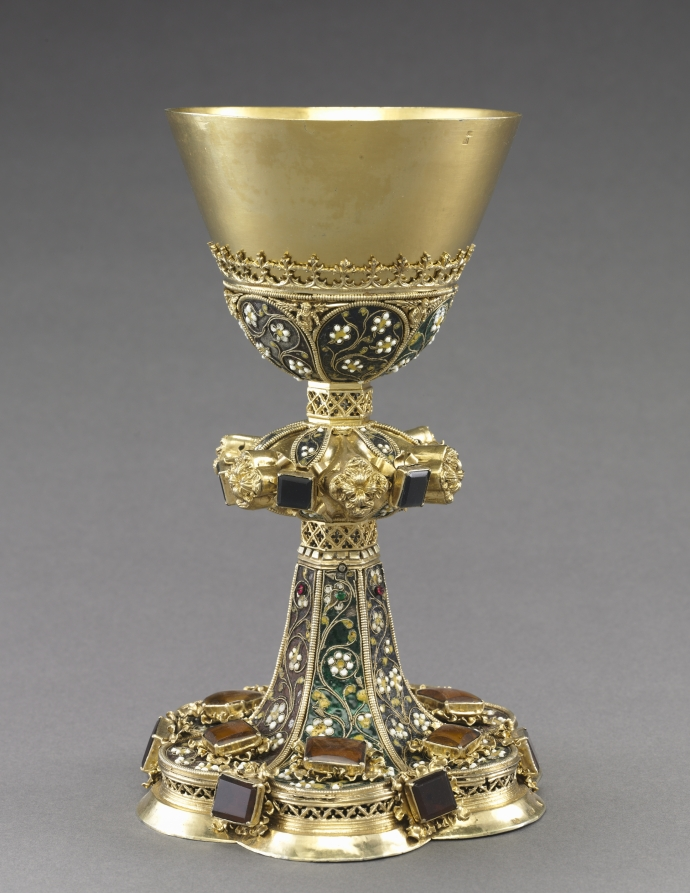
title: Chalice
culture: Hungary, Budapest?, 15th century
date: c. 1450–1480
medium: gilt silver and filigree enamel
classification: Metalwork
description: The chalice and paten—the most important liturgical vessels—are used at the altar by the priest for the consecration of the Eucharistic bread and wine during the celebration of the mass. This chalice survives with its original paten. The form of the chalice evolved over the centuries. Gothic chalices, like this one, gradually developed angular or faceted knops, generally hexagonal, with lobed feet. This sublime example is decorated with filigree enamel consisting of twisted gold wire forming a floral design, which in turn is filled with colorful glass pastes. Gemstones add to the embellishment.